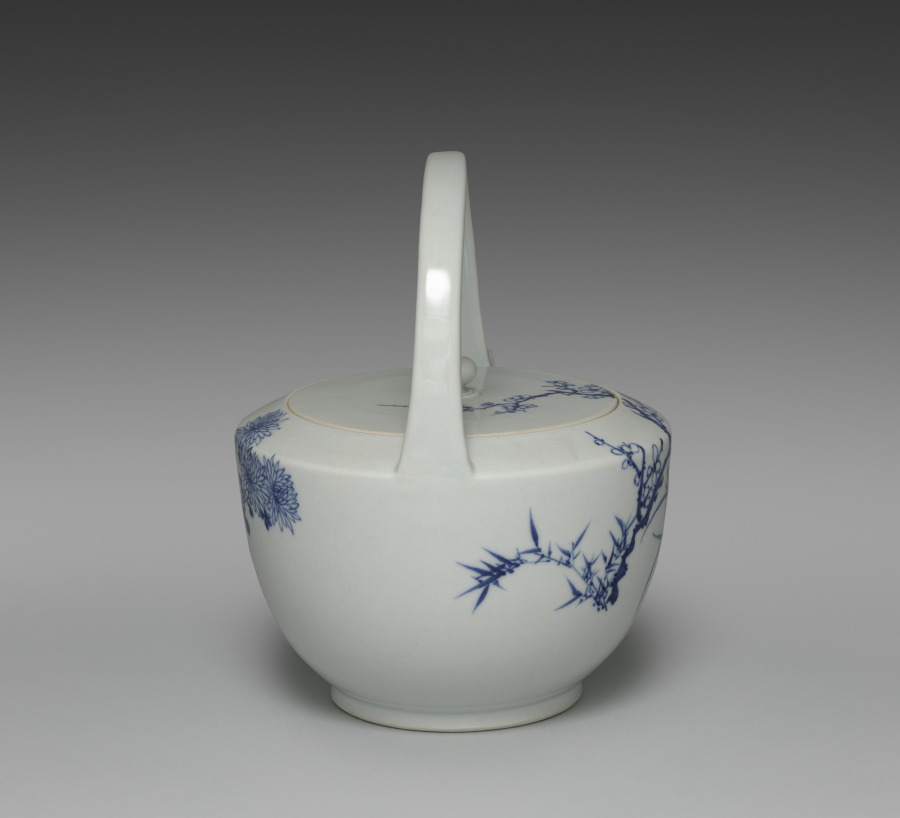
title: Sake Pourer with Chrysanthemum, Orchid, and Plum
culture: Japan, Meiji period (1868–1912)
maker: Seifū Yohei III (Japanese, 1851–1914)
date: c. 1887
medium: Porcelain with underglaze blue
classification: Ceramic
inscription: Artist's signature in underglaze blue on the base.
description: Seifū Yohei II and his successor, Seifū Yohei III, trained in ink painting. Their brush skills are seen in their underglaze cobalt blue designs. Orchid, bamboo, chrysanthemum, and plum, appearing on Yohei III’s sake pourer, are known as the Four Gentlemen. They symbolize the virtues of humility, integrity, endurance, and perseverance.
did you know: This sake pourer is decorated with the Chinese theme of the Four Nobles, in which the qualities of a good person are represented by plant.